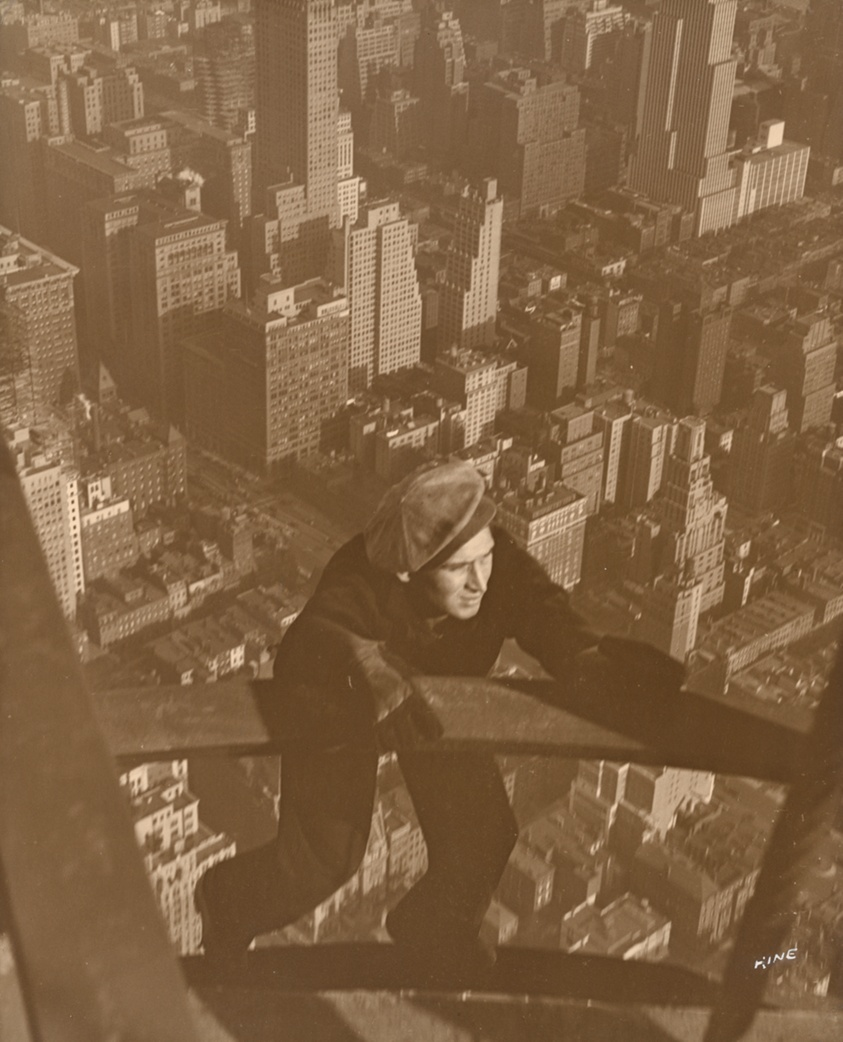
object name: Photograph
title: Climbing up the Beams on the Empire State-100 Stories Up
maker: Lewis Wickes Hine (American, 1874–1940)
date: 1931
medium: Gelatin silver print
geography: United States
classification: gelatin silver (developing-out-paper) pr; photographic process; photography; photograph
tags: cityscapes, documentary